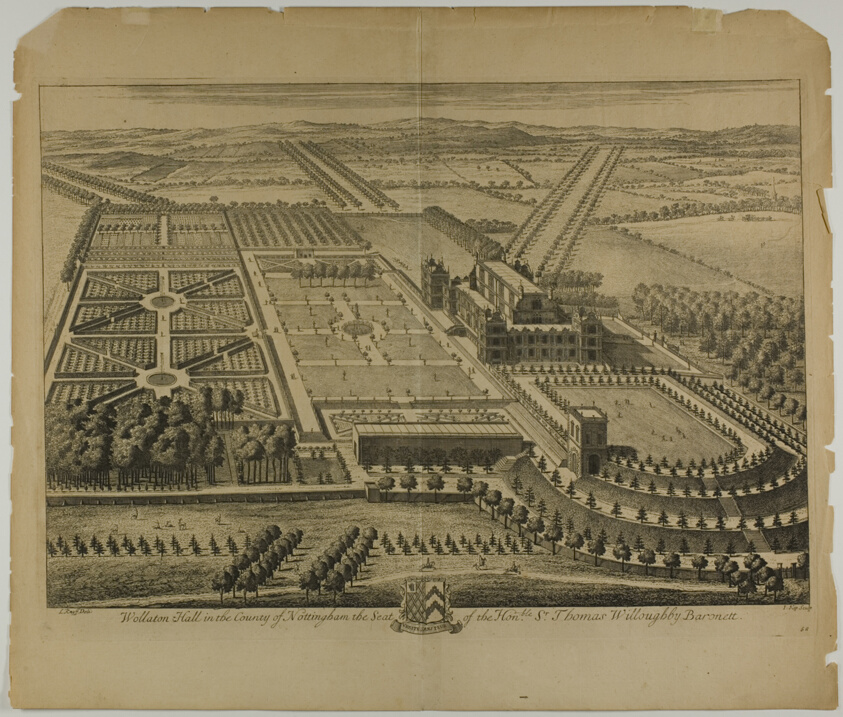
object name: Print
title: Wollaton Hall in the County of Nottingham, plate 68 from Britannia Illustrata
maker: Jan Kip (Dutch, c. 1653-1722); after Leonard Knyff (Dutch, 1650-1721); published by David Mortier (French, 1673-1728)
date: published 1707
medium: Etching, with engraving, in black on cream laid paper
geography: Netherlands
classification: prints and drawing; engraving; etching; print